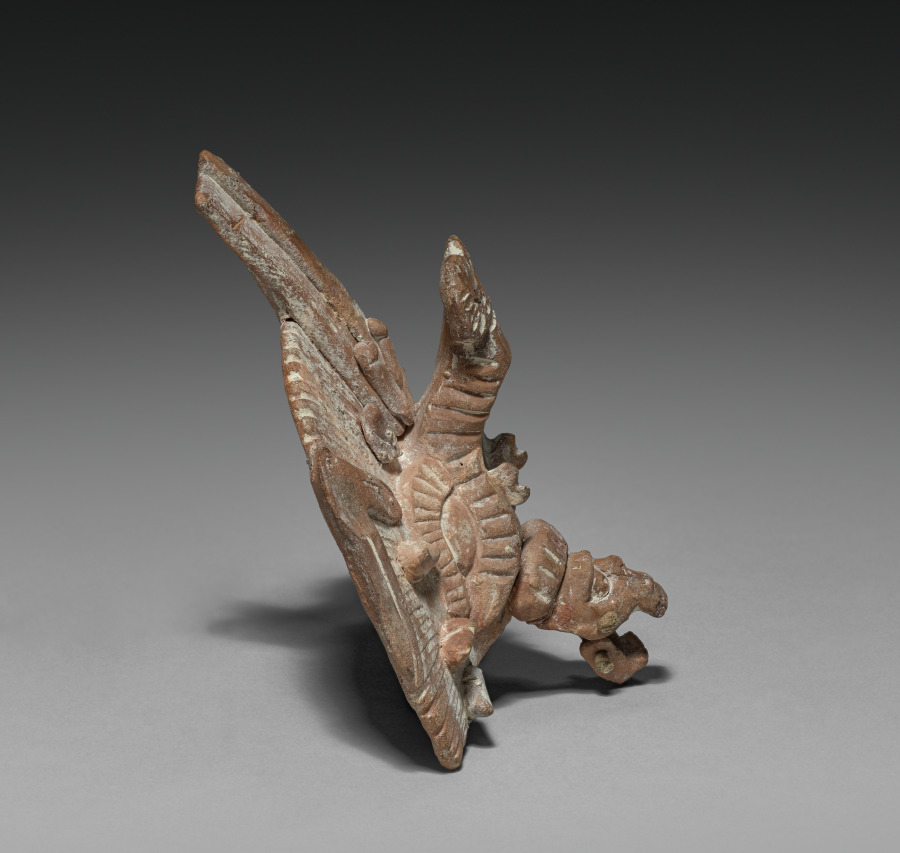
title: Seated Lord with Removable Headdress: Headdress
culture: Mesoamerica, Maya, probably Jaina Island, Late Classical period, 7th-9th century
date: 600–800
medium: ceramic and slip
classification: Ceramic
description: The major Maya grave offerings on Jaina Island were ceramic figurines that depict deities and humans in a variety of roles. The headdress belongs to a seated figure who represents a male, perhaps another warrior, who wears a huge zoomorphic headdress. A skeletal face with articulated jaw descends from the headdress to fit as a mask over the figure’s face.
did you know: It is estimated that some 20,000 people were buried on the tiny island of Jaina over a 500-year period.